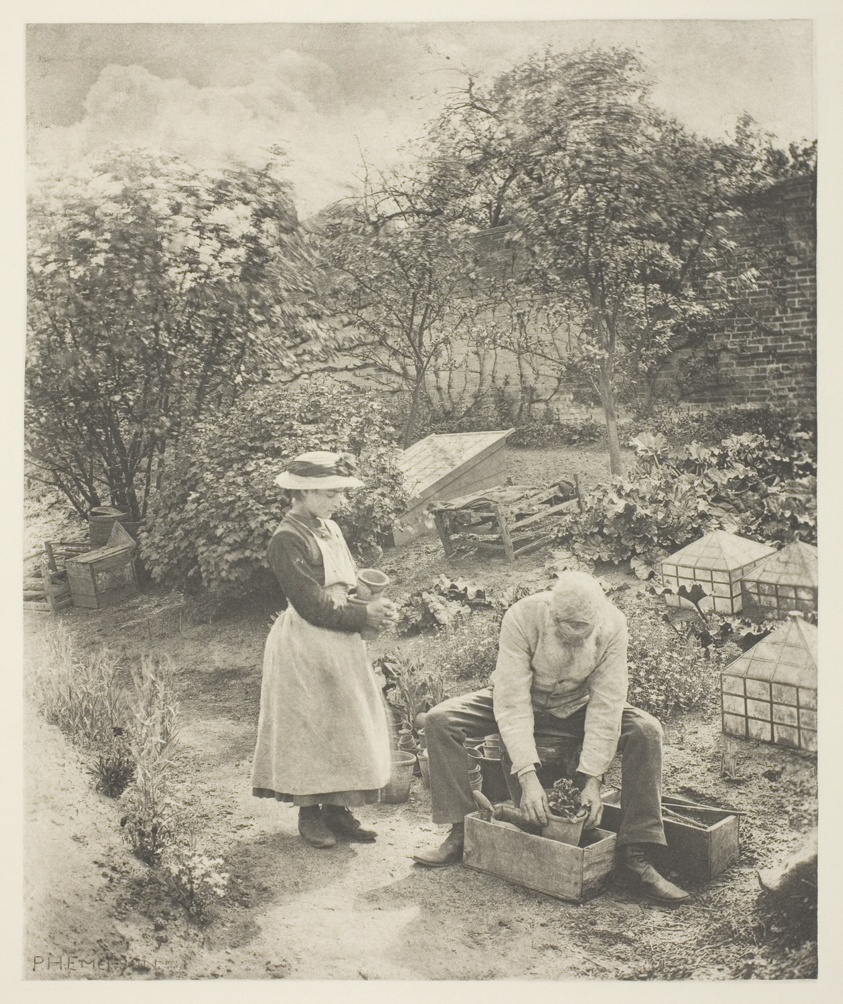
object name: Photograph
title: A Garden End (Suffolk)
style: 19th century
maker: Peter Henry Emerson (English, born Cuba, 1856–1936)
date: c. 1883/87, printed 1888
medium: Photogravure, plate XXIX from "Pictures of East Anglian Life," published by Sampson Low, Marston, Searle & Rivington (1888)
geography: England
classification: photogravure; photomechanical process; photography; photograph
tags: Collected by Hugh Edwards, Pictures of East Anglian Life, Seat of War in the Crimea